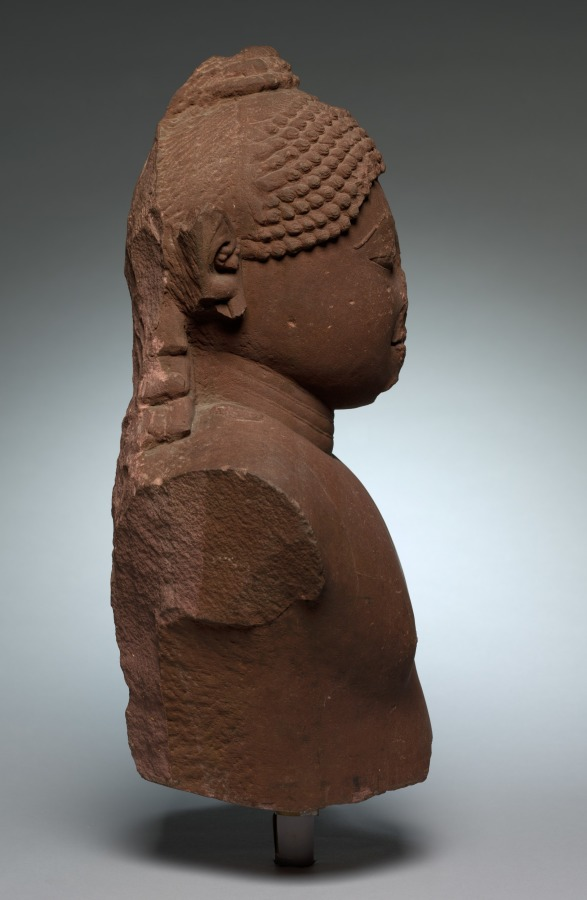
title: Rishabha, the First Jina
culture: Central India, Chandela Dynasty, 9th - 10th Century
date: 800s–900s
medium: stone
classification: Sculpture